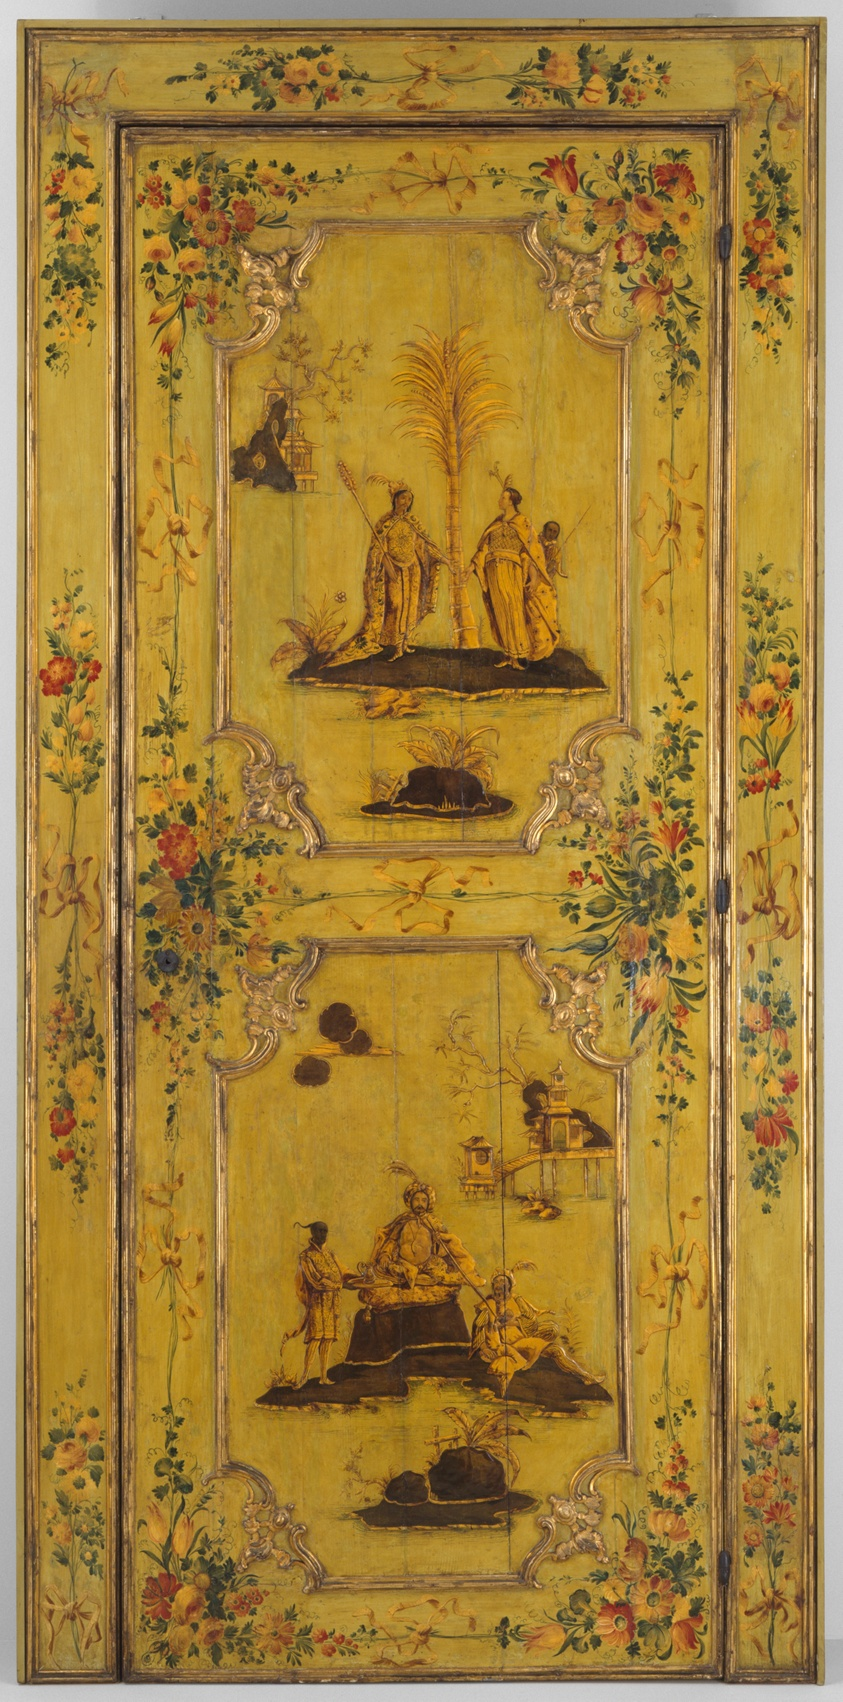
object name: Furniture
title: Door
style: Rococo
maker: Italian; Venice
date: c. 1750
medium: Wood, gessoed and lacquered with polychrome decoration and gilding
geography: Venice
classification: wood; architectural fragment; european decorative arts; furniture